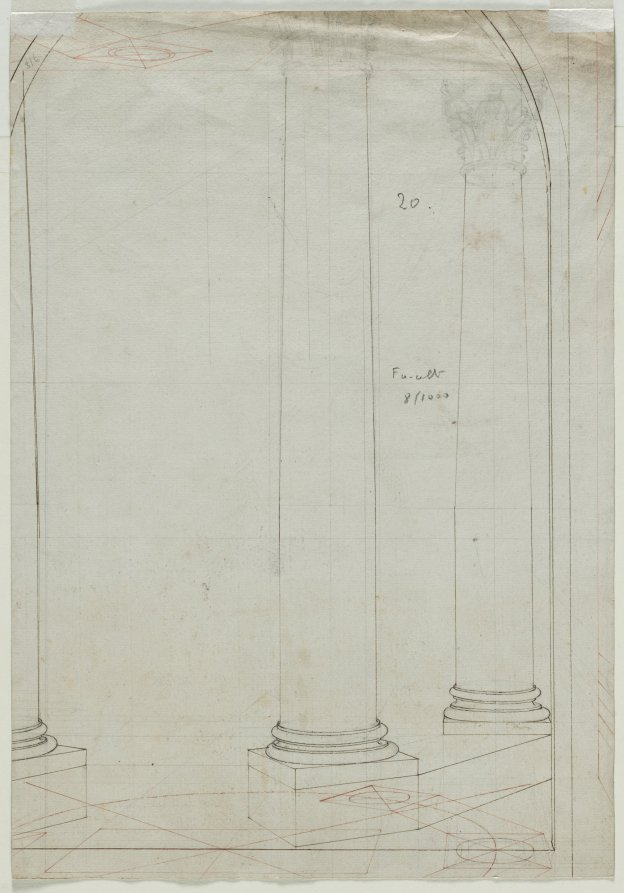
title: Architectural Drawing of Columns (verso)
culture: Italy, 19th century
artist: Pietro Fancelli (Italian, 1764–1850)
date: c. 1810–1820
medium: pen and brown ink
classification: Drawing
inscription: Verso, upper right, in graphite: "316" verso, in graphite: "20 Fancelli (?) 8/1000"